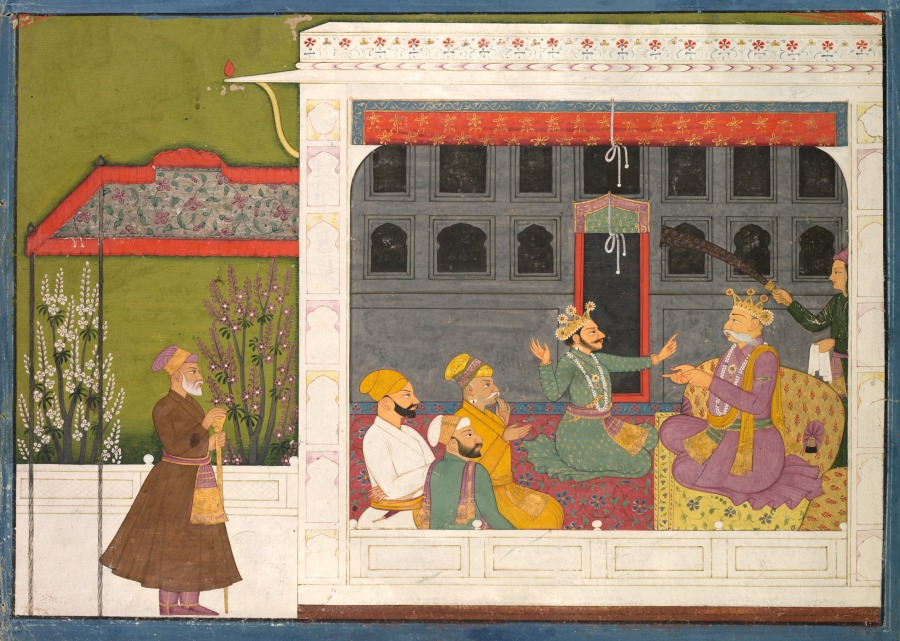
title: Shishupala arguing with Rukmini’s father, Bhishmaka, from a Rukmini Haran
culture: Northern India, Pahari kingdoms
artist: possibly by Mola Ram (Indian)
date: c. 1800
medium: Gum tempera, ink, and gold on paper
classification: Painting